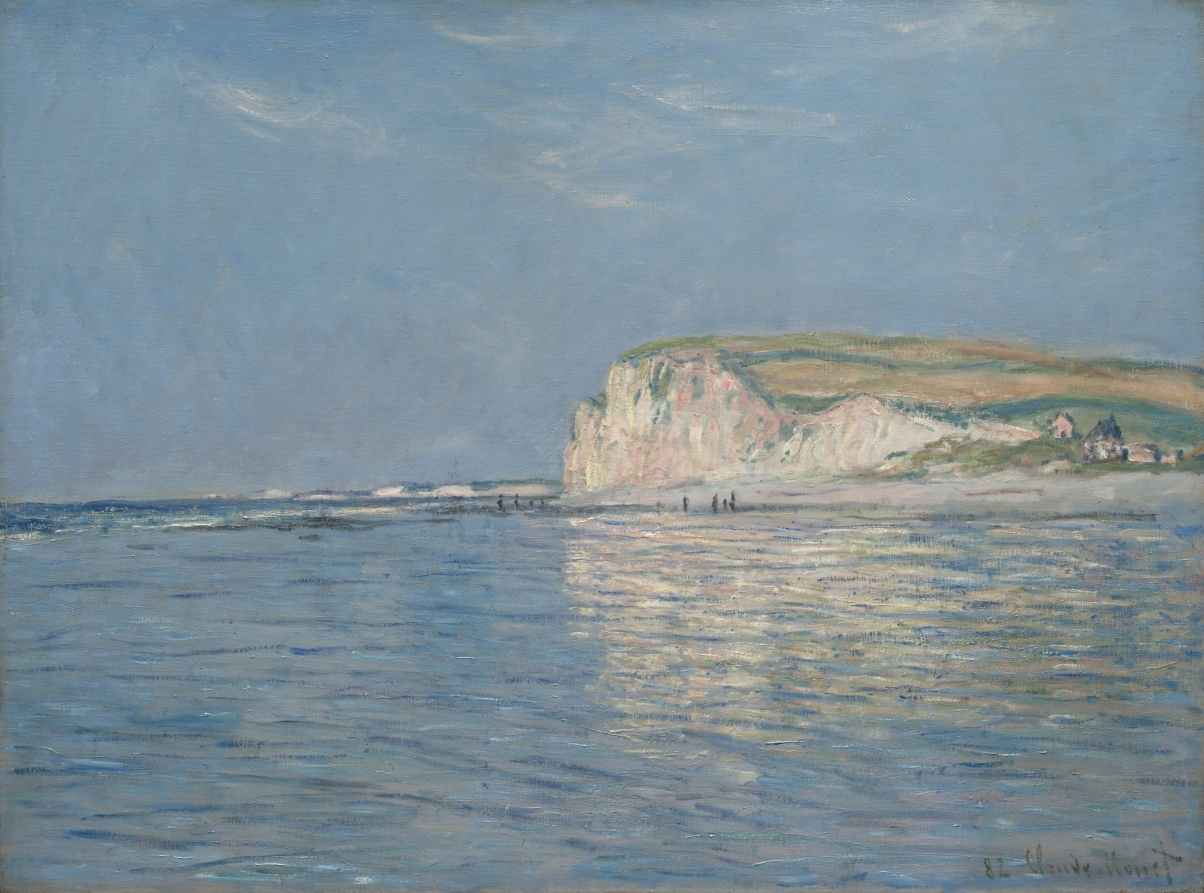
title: Low Tide at Pourville, near Dieppe, 1882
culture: France, 19th century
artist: Claude Monet (French, 1840–1926)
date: 1882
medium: oil on fabric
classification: Painting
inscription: Signed lower right: 82 Claude Monet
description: This is one of several views Claude Monet painted of Pourville, a fishing village on the north coast of France in Normandy. Pourville featured a boardwalk, a broad beach, and stunning cliffs. According to the artist's correspondence, the village was nothing special, but he was inspired by the landscape: "One could not be any closer to the sea than I am, on the pebbled beach itself and the waves beat at the foot of the house." During the spring of 1882 in Pourville, Monet stayed in a small hotel similar to the dwellings seen at the foot of the cliff to the right in this painting.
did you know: The narrow strokes of black paint along the the edge of the water at the base of the cliff indicate bathers.